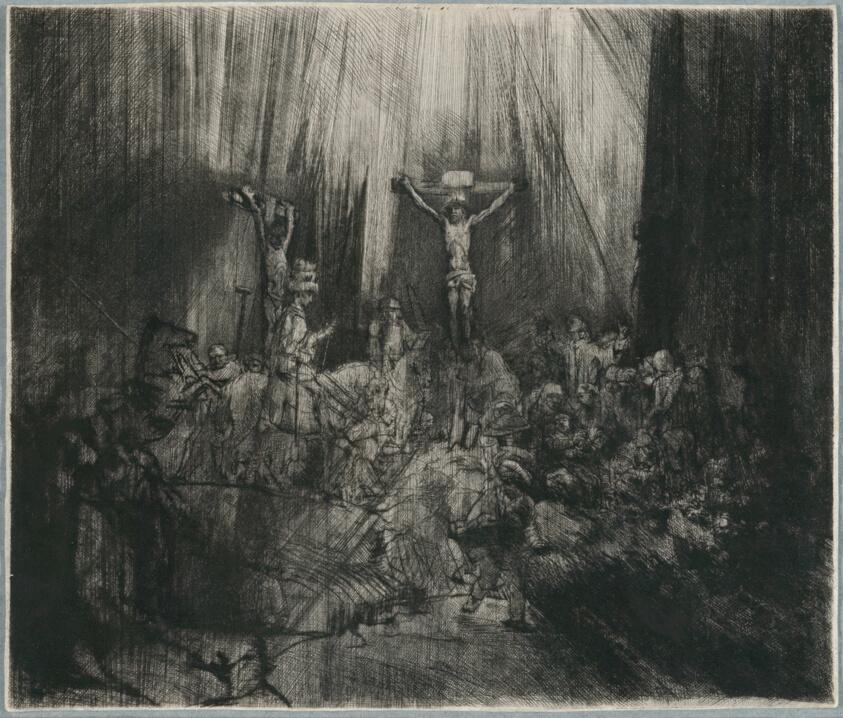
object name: Print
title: Christ Crucified between the Two Thieves: "The Three Crosses"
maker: Rembrandt van Rijn (Dutch, 1606-1669)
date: 1653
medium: Drypoint and burin on paper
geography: Holland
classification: drypoint; paper; print; prints and drawing